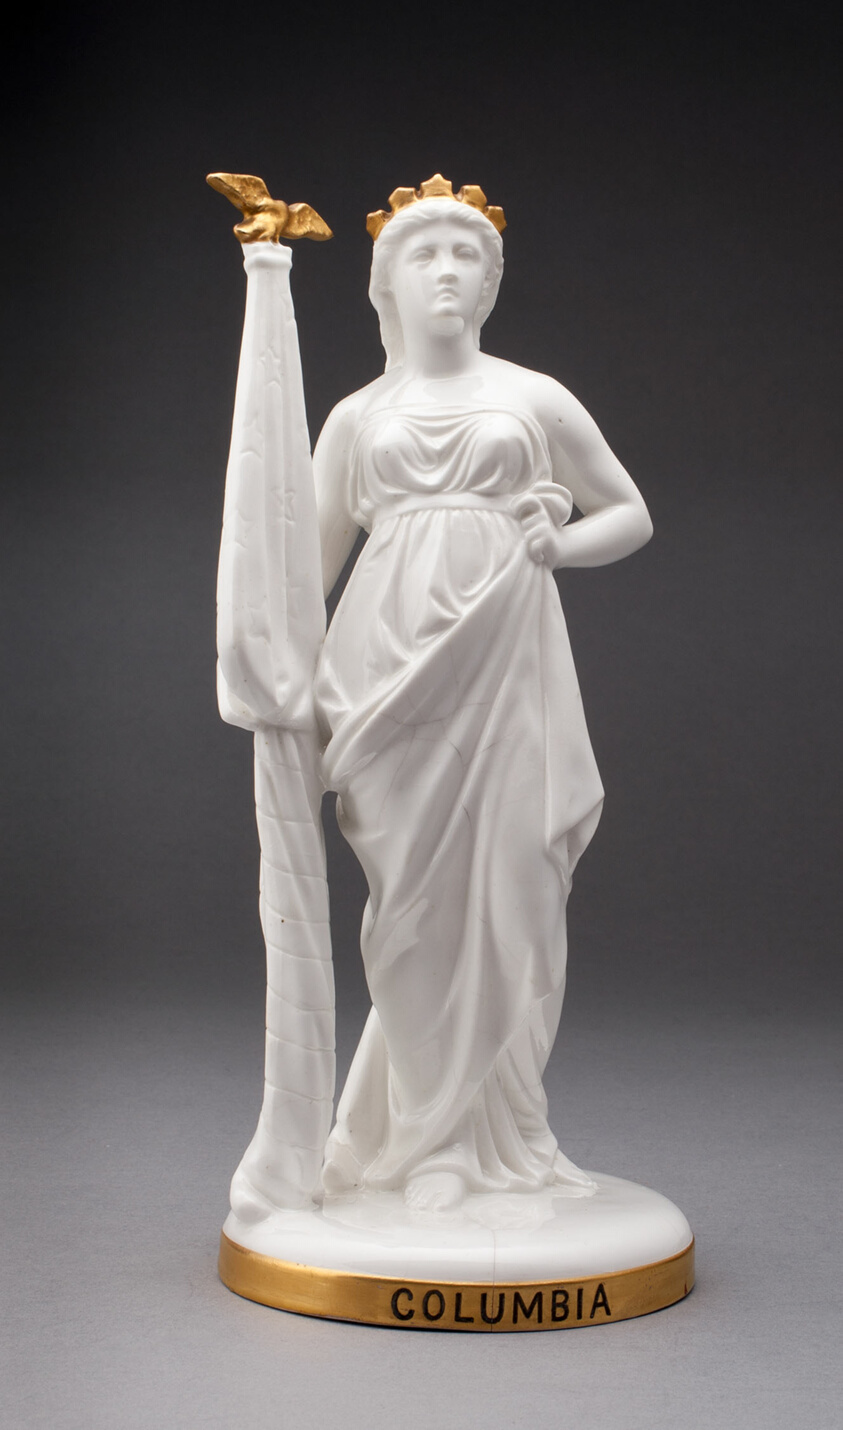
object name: Ceramics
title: Allegorical Figure of Columbia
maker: Mintons Ltd. (English, founded 1793)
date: c. 1800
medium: Soft-paste porcelain with gilding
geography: Stoke on Trent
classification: sculpture; porcelain; european decorative arts; ceramics